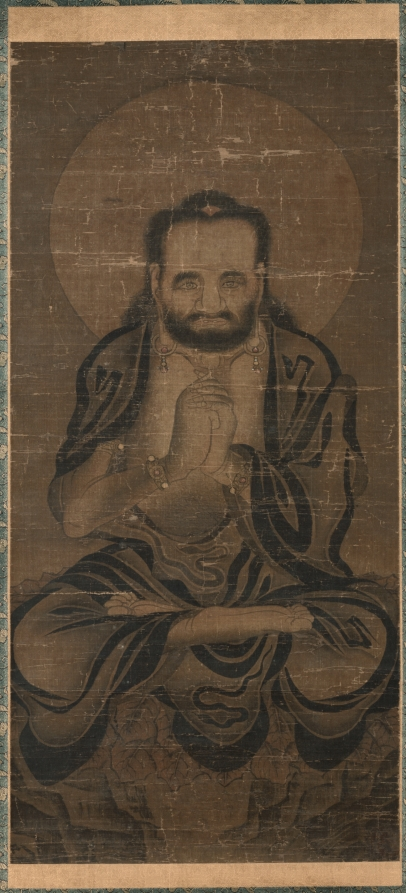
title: Sakyamuni Buddha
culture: China, Yuan dynasty (1271-1368)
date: 1300s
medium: Hanging scroll; ink and color on silk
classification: Painting